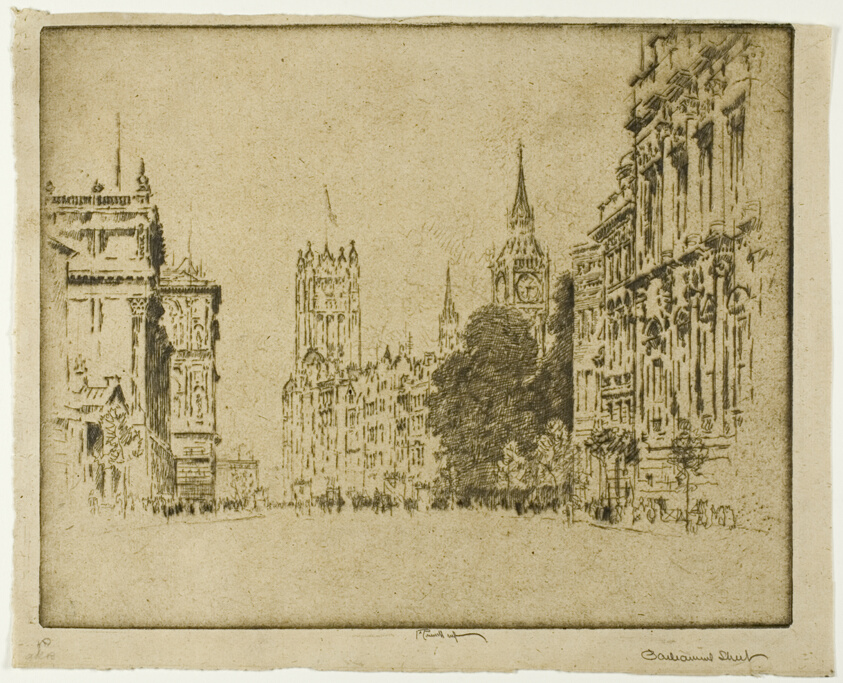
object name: Print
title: Parliament Street, Westminster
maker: Joseph Pennell (American, 1857-1926)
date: 1904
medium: Etching on buff laid paper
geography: United States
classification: etching; print; prints and drawing